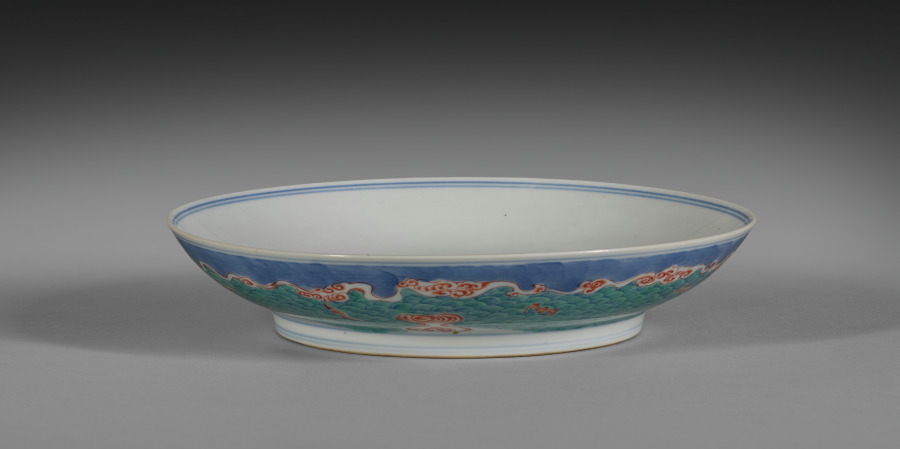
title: Plate with Isle of the Immortals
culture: China, Jiangxi province, Jingdezhen kilns, Qing dynasty (1644-1911), Yongzheng mark and reign (1723-35)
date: 1723–35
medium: porcelain decorated in underglaze cobalt blue and overglaze enamels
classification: Ceramic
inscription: 大清雍正年製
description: This multicolored dish is decorated with the sacred isle, also seen on the exterior of the blue-and-white dish nearby. A pavilion emerges amid rising and falling waves, a symbol of constant transformation and change. Above the waves are mysterious clouds, symbolizing the cosmic vital energy (qi) that animates all things and beings on earth in Daoism. The interior of the dish also shows cranes carrying sticks in their beaks, a motif that symbolizes longevity. Cranes carrying sticks above a pavilion in the sea express the wish “May you live to a ripe old age (haiwu tianchou; 海屋添籌).”